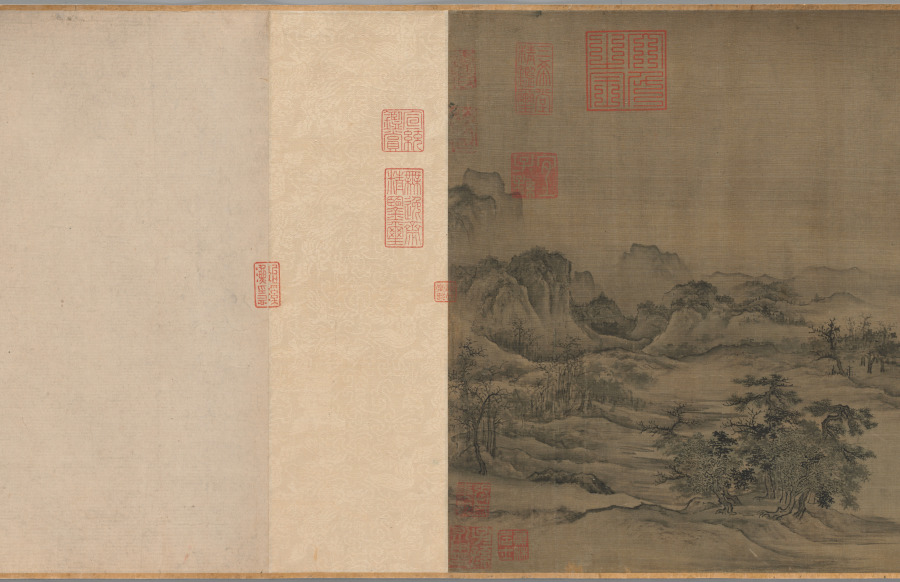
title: Streams and Mountains without End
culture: China, late Northern Song dynasty (960-1127) - Jin dynasty (1115-1234)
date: 1100–1150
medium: handscroll; ink and slight color on silk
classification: Painting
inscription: 9 colophons and 48 seals: 1 colophon, dated 1205, of Wang Wenwei 王文蔚 (dates unknown); 1 colophon, dated 1205, of Li Hui 李惠 (dates unknown); 1 colophon of Weiluo Tian Xie 蔚羅田獬 (dates unknown); 1 colophon, dated 1214, of He Yan 何言 (dates unknown); 1 colophon, dated 1326, of Cao Yuanyong 曹元用 (d. 1329) 1 colophon, dated 1332, of Kangli Zishan 康里子山 (Naonao; 1295-1345); 1 colophon, dated 1336, of Liu Zai 劉載. (dates unknown); 1 colophon, dated 1380, and 4 seals of Yang Mao 楊懋 (1300-after 1380); 4 seals of the Hou family (ca. 1340); 1 colophon of Wang Duo 王鐸 (1592-1652); 4 seals of Zhang Bingqian 張秉乾 (juren of 1729); 8 seals of Liang Qingbiao 梁清標 (1620-1691); 2 seals of the Qianlong emperor (r. 1736-95); 4 seals of the Jiaqing emperor (r. 1796-1820); 3 seals of the Xuantong emperor (r. 1909-11); 2 seals of Ye Gongchuo 葉恭綽 (1881-1968); 17 seals of Zhang Yuan 張爰 (Zhang Daqian 張大千, 1899-1983).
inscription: Colophon 1. Wang Wenwei 王文蔚. Dated third month and third day, 1205, under the reign of Zhangzong of the Jin dynasty. 造物元無心，山川秀氣聚。畫手亦無盡，各出新意度。 誰將妙林泉，淡墨寫縑素。重巒疊嶂間，三兩人家住。 茅舍隔素籬，小橋通細路。溪上數葉舟，雅有物外趣。 嵓崦藏招提，依稀認窗戶。山色四時宜，雲煙自朝暮。 不知塵世中，此景在何處。收拾買山錢，投老好歸去。 泰和乙丑三月三日平原王文蔚謹再拜，書于河東縣署之野趣堂。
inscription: Colophon 2. Li Hui 李惠. The colophon was written three days before the Qingming Festival in 1205. 畫師慣在山中居，含毫吮墨聊自娛。 閑將一段冰霜絹，寫出千里江山圖。 前山後山互出沒，山腰林樾相縈紆。 危橋澗溜瀉鳴玉，山根一匯為平湖。 波平短艇快漁釣，雲深細徑來樵蘇。 僊宮梵宇占幽勝，雕欄複閣森蓬壺。 往來行客煙靄外，飄飄野店青帘孤。 人家雞犬聲相接，熙熙化日安唐宇。 嗟余嗜好何其迂，膏肓泉石真吾徒。 一行作吏墮世網，薄書汨沒勞奔趨。 千巖萬壑但夢想，故園三徑應將蕪。 披圖暫洗黃塵眼，拊膺三嘆空踟躕。 泰和乙丑清明前三日絳臺李惠書于舜城府署之九思堂。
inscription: Colophon 3. Weiluo Tian Xie 蔚羅田獬. 畫工紛紛不可紀，擺脫俗流幾人耳。 夫誰援筆掃鵝溪，一段風煙且千里。 白波青嶂渺無窮，水接山兮山插水。 小橋野店相勾連，古寺樓臺突兀起。 飄然氣象與神俱，但患未明孰姓氏。 郭熙雖老典型存，為問主公無乃是。 此畫世希當寶藏，無與碌碌同一視。 更看卷首數公詩，奇絕清新相表裏。 蔚羅田獬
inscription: Colophon 4. He Yan 何言. Written in 1214. 萬有來自無，一真歸所託。畫師得三昧，胸中幻丘壑。 百態逐墨破，群形隨筆落。地近迹分明，天遙痕隱約。 雲物自吐吞，峯巒非斧鑿。江鄉閴無市，谷關常不鑰。 中有野夫閑，童琴而歩鶴。酒斾出籬懸，漁舟臨岸泊。 澗樹蔽橋樑，巖松迷殿閣。岑疊宿霧重，野曠林煙薄。 危棧接縈紆，亂泉通脈絡。途中人往來，僕馬何羸弱。 怪石虎踡跼，古木龍蟠錯。一幅宜好收，千金非易博。 玉堂閑卷舒，眼界增寥廓。視險尚寛平，見危除慘虐。 氣象溢國華，川澤資廟略。功名業已書，歸去鞭先著。 但知色即空，何是今非昨。飽乎仁智心，箇中無限樂。 貞祐甲戌秋暮，東營何言題。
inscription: Colophon 5. Cao Yuanyong 曹元用 (d. 1329). Dated 1326. 岸擁危橋斷，溪浮小艇斜。 萬山最深處，依約兩三家。 泰定丙寅秋，曹元用題。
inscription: Colophon 6. Kangli Zishan 康里子山 (i.e., Kangli Naonao). The colophon bears a date of 1332. 右溪山圖，意韻蕭灑。一見使人有烟霞之想，真可珍藏。又有□金諸名勝題詩其左。兵火之餘， 殊不易得也。 至順三年暮春之月，康里子山跋。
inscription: Colophon 7. Liu Zai 劉載. 雲拂埜田閑種玉，雨餘巖溜碎傾金。 幾時也結團茆去，麟閤恬然不挂心。 至元二年正月，長安劉載載之謹錄上。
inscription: Colophon 8. Yang Mao 楊懋 (1300–after 1380). 觀此圖，經營位置，筆法高古，山明石潤。其橋梁、路道、樹林、人物、遠近；一一誠得真山水之深趣。非當時名筆有大才者不能至此。不必問其誰何，可為神品。况宋金元三朝名公所跋，尚不能記，想其來尤遠矣。然而物經累變而尚存，是物之有壽者也。余不復再論。文顯其保之。洪武庚申春，八十翁楊懋觀。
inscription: Colophon 9. Wang Duo 王鐸 (1592–1652). 文蓀親翁博雅，文詩鴻暢。舍弟持此喜觀，遂抽管題數語： 山勢委折，筆墨無痕。宋人中如此不多見也。譬之兵家，當是韓白。王鐸。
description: Streams and Mountains without End was a landmark acquisition of 1953, made just a year after Sherman Lee had returned to Cleveland as curator of Oriental art. He acquired it with the intention to provide "a more than adequate foundation for a fine collection of Chinese landscape painting." This impressive work demonstrates the culmination of stylistic developments in Chinese monumental landscape painting following the Northern Song tradition. It represents a journey through a landscape, making it a fitting metaphor for Lee’s journey of discovery and achievement over a lifetime.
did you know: The portrayal of the distant lands is rich with details like pavilions, villages, and human activities.